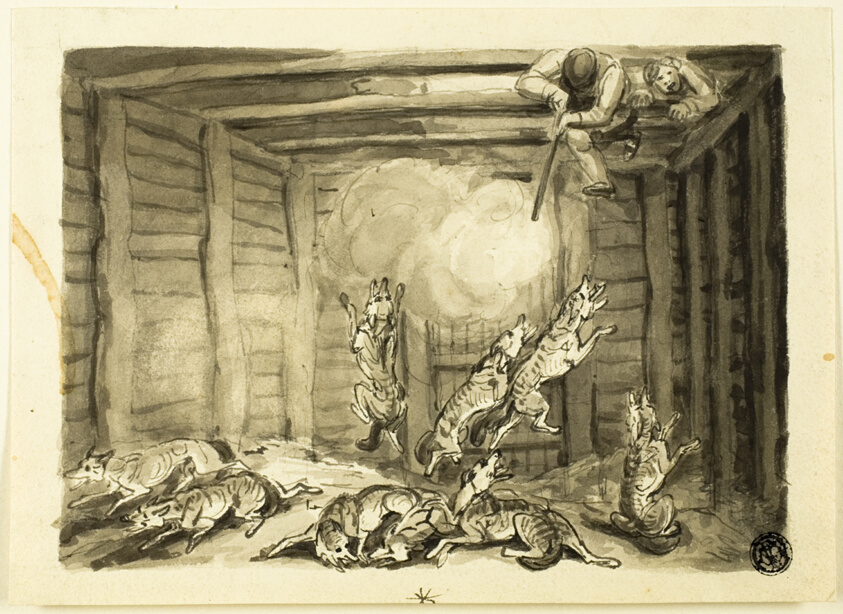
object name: Drawing and Watercolor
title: Wolf Hunt in Russia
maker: Attributed to Samuel Howett; English, c. 1765-1822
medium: Pen and black ink, with brush and gray wash, over graphite, on cream wove paper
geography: England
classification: ink or chalk wash; drawings (visual works); prints and drawing